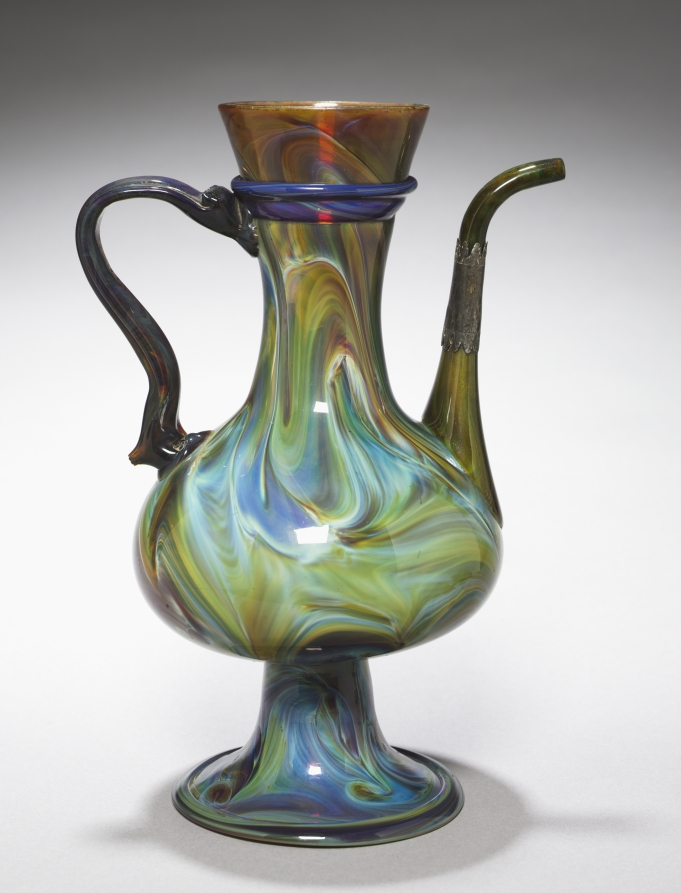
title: Ewer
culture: Italy, Venice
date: c. 1500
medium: "Chalcedony" inlaid glass; silver mount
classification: Glass